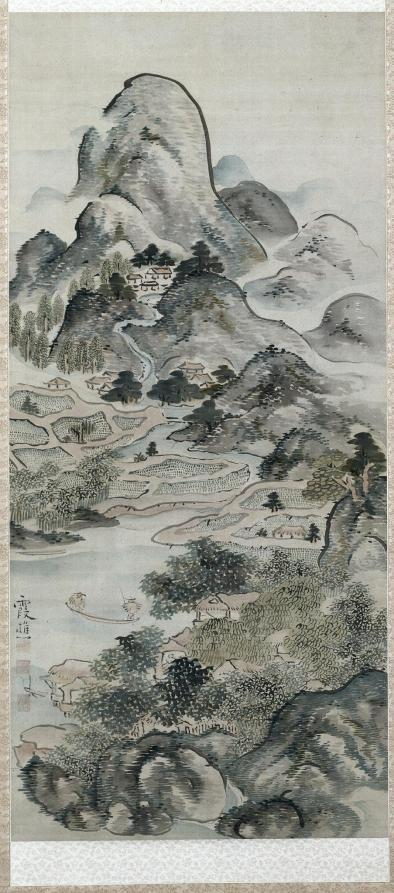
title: Fishing in Springtime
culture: Japan, Edo period (1615–1868)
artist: Ike Taiga (Japanese, 1723–1776)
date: 1700s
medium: Hanging scroll; ink and color on silk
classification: Painting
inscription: Signature: 霞樵, transliteration, Kashō; seals: 池無名印, transliteration, Ike Mumei in; 三岳道者, transliteration, Sangaku Dōja; 遵生, transliteration, Junsei.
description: Ike Taiga was subject to many artistic influences; we know he practiced Zen calligraphy from an early age, his father may have had ties to the famous painter Ōgata Kōrin (1658–1716), he may have trained under a Tosa school painter, and he is thought to have seen Western images early on that informed his approach in representing depth. Though he started with professional beginnings—making a living after his father’s death by selling paintings on fans—he surrounded himself with the members of the literati community, and never stopped absorbing stylistic influences from diverse sources throughout his career. As a result, his style is unique and aesthetically definitive of nanga—the name given to Japanese literati painting.